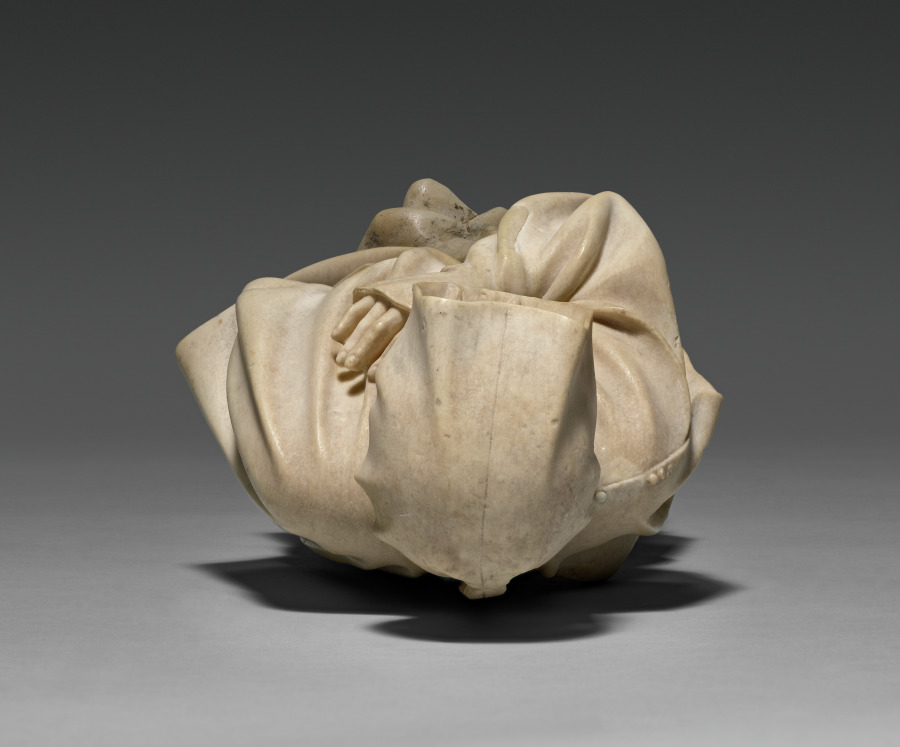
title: Mourner from the Tomb of Philip the Bold, Duke of Burgundy (1364–1404)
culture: Netherlands, active Dijon, 15th century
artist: Claus de Werve (Netherlandish, 1380–1439)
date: 1404–10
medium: vizille alabaster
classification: Sculpture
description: This figure comes from the tomb of Duke Philip the Bold from the church of Champmol near Dijon (Burgundy, France). Philip, who founded the monastery and designated it as his burial place, hired the best artists, many of whom came from the Netherlands. While the commission was given in 1381, the work was not completed until 1410, six years after the duke’s death. This mourner is unusual for the time because it is not carved as a static low relief on the pedestal of the tomb but interacts with the viewers and their fellow procession members. The lifelike quality of the figure is due in large part to the alabaster. Its softness allowed artists to carve details into the material, and the transparent, milky white stone could also be polished to a high gloss.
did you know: A plaster cast of this mourner decorates the empty niche in the Tomb of Philip the Bold in Dijon, France.